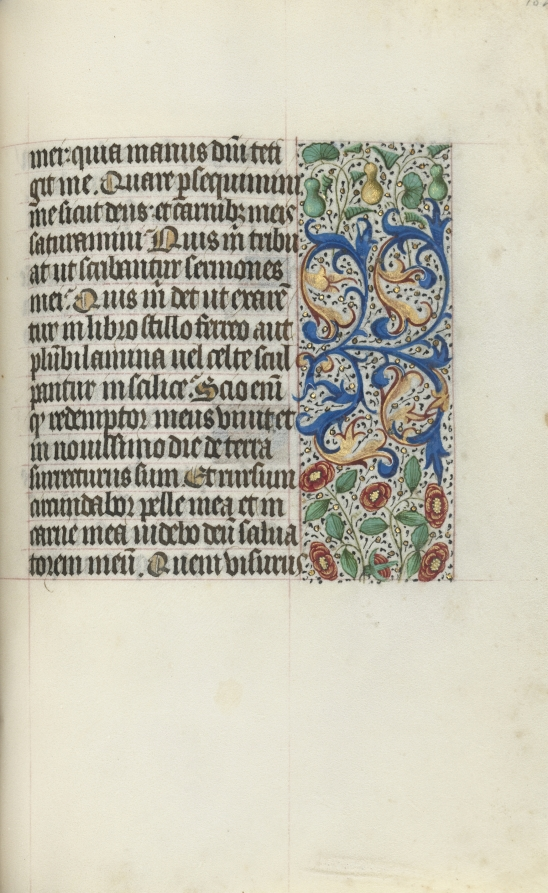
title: Book of Hours (Use of Rouen): fol. 132r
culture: France, Rouen, 15th century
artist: Master of the Geneva Latini (French, active Rouen, 1460–80)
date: c. 1470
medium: ink, tempera, and gold on vellum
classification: Bound Volume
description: In the late 1400s and early 1500s Rouen was an established and important center of book production. The city’s cathedral had a wealthy chapter that spent large sums of money to commission books and to maintain its extensive library. The stationers and booksellers would have likely been concentrated in or near the cathedral precinct. This artist, named after a manuscript now in Geneva, was Rouen’s principal illuminator during the second half of the 1400s.